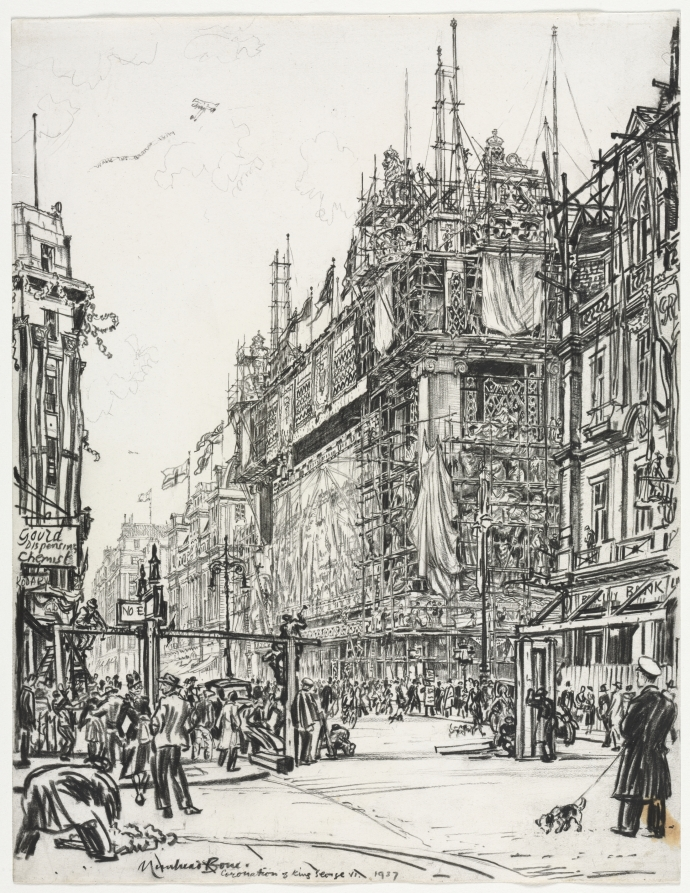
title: Selfridges, Oxford Street; Coronation of George VI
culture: England, 20th century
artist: Muirhead Bone (British, 1876–1953)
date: 1937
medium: ink and graphite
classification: Drawing